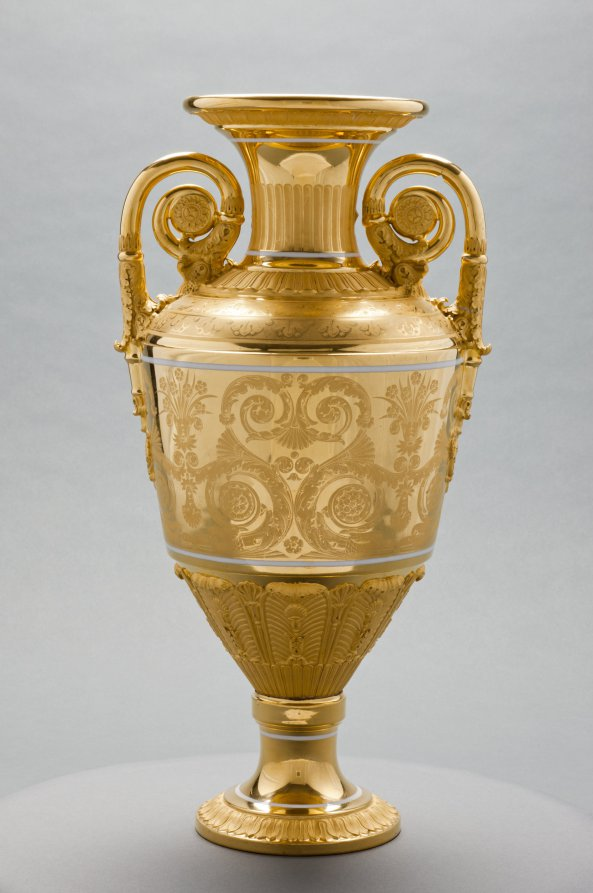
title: Vase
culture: Russia, St. Petersburg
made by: St. Petersburg Imperial Porcelain Factory (Russian)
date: c. 1820–1830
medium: gilt porcelain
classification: Ceramic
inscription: inscribed: "Moreau" in gold near lip.